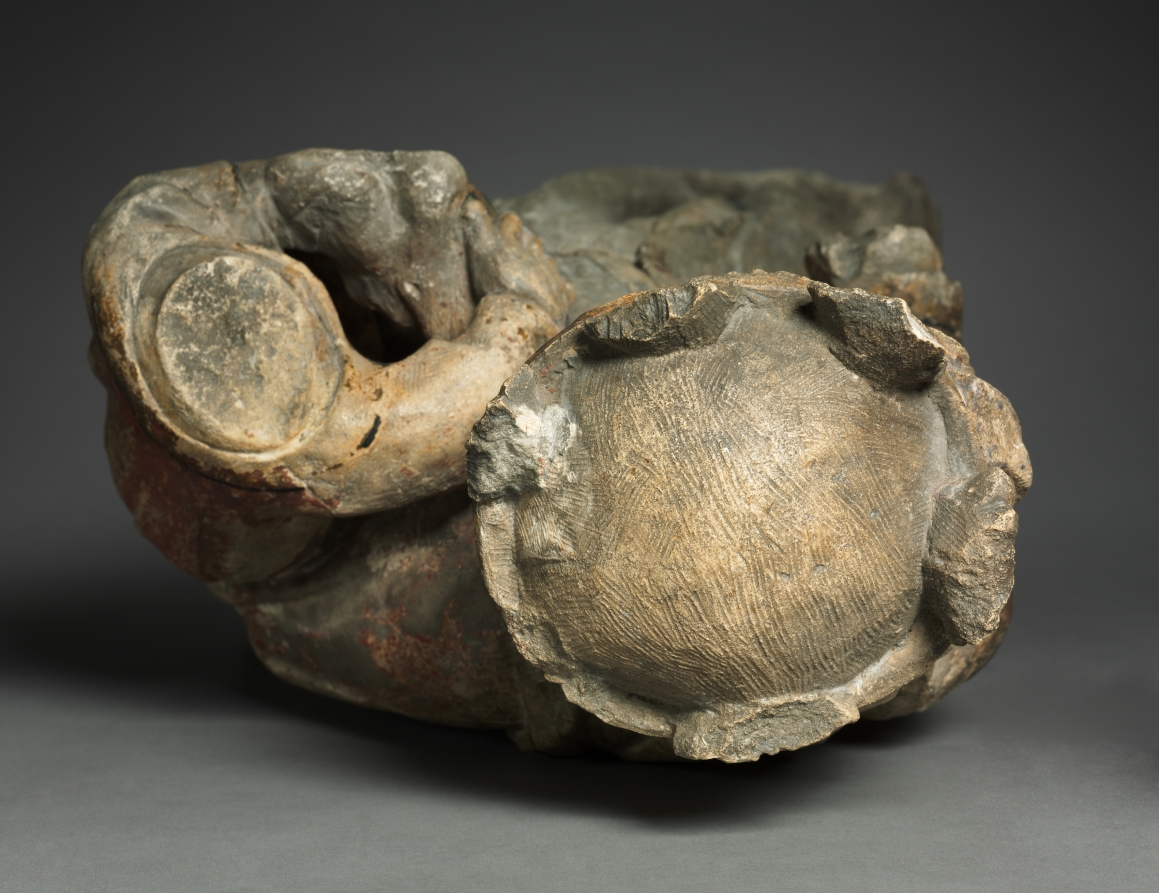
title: Virgin and Child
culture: France, Lorraine, 14th century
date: c. 1315–20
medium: limestone with traces of polychromy and gilding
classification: Sculpture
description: This graceful Virgin and child is a beautiful example from a large number of such figures produced in Lorraine, in eastern France, during the early 1300s. Lorraine at the time had a well-established artistic tradition and was under the rule of the Counts of Bar with established cultural links to both Flanders and England. Many of the surviving Lorraine Virgins share common characteristics consistent with this example--the swaying posture, with the weight of the Virgin placed on the left foot; and an open mantle with an exposed belted gown, the girdle itself trailing to the ground and ornamented with rosettes. Such standing figures were likely made for use in parish churches, cathedrals, aristocratic oratories, and monastic chapels, and attest to the intense veneration rendered to the Virgin during the period.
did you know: The CMA has a rare example of a similar woman’s belt (1930.742).